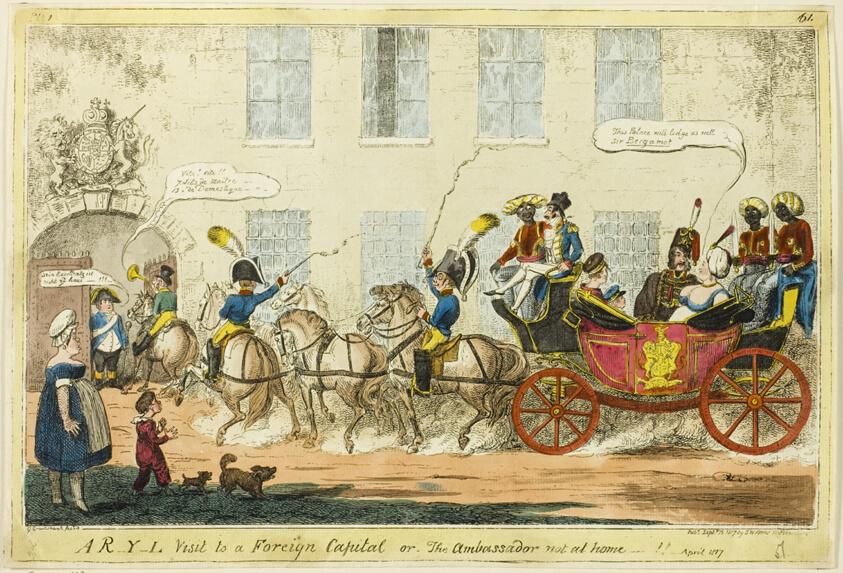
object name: Print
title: A R-Y-L Visit to a Foreign Capital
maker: George Cruikshank (English, 1792-1878); published by S.W. Fores (English, 1761-1838)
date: published September 15, 1817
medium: Hand-colored etching on paper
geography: England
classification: etching; print; prints and drawing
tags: dogs, animals